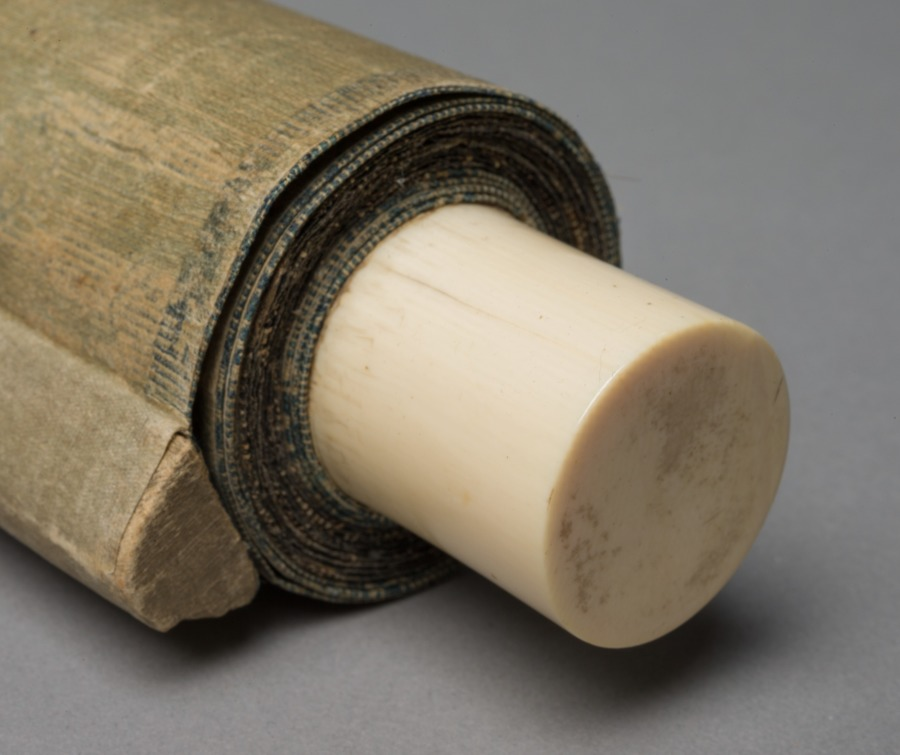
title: Lonely Temple and Towering Cliff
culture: Japan, Muromachi period (1392–1573)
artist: circle of Kenkō Shōkei (Japanese, active 1478–1506)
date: c. 1480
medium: hanging scroll; ink and slight color on paper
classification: Painting